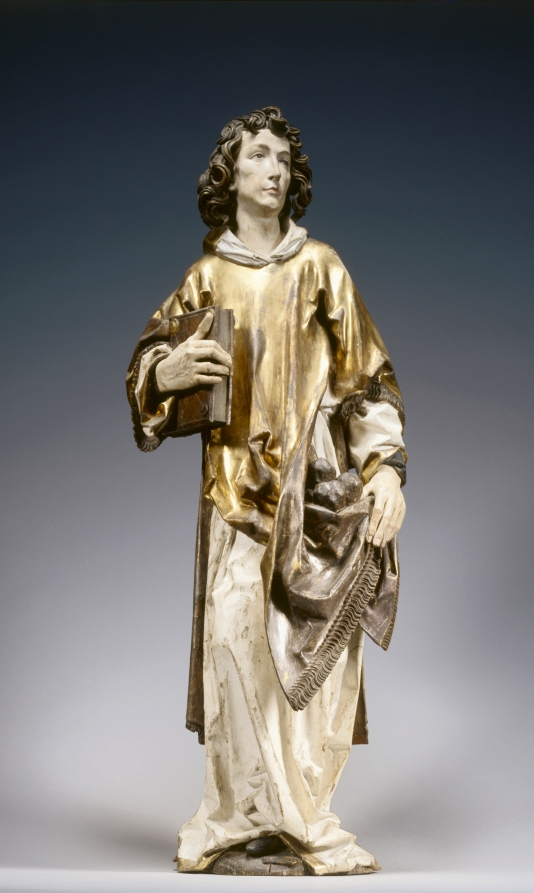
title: Saint Stephen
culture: Germany, Würzburg, 16th century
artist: Tilman Riemenschneider (German, active Würzburg, c. 1460–1531)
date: 1502–8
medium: lindenwood with polychromy and gilding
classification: Sculpture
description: This sculpture, along with that of Saint Lawrence (1959.42) and two others in Germany, are believed to be the remaining fragments of a large altarpiece carved by Riemenschneider for the Dominican convent in Rothenburg in Franconia (demolished in 1813). Saints Stephen and Lawrence both wear the dalmatic to indicate their status as deacons in the early church. Each holds a symbol of his martyrdom; here, Saint Stephen cradles some stones to indicate his death by stoning. Art in Germany through the early 1500s remained firmly anchored in the late Gothic style with its associated interests in realism. Riemenschneider was one of the most prolific and versatile sculptors of this style, a recognized master in both stone and wood. His flourishing workshop employed as many as 40 apprentices in sculpting, woodcarving, and painting. His sculptures are noted for the dreamy, melancholy, and introspective quality in their expressions, as well as their remarkable attention to detail.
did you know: Tilman Riemenschneider (c. 1460–1531) is probably the most famous German sculptor of the period around 1500.